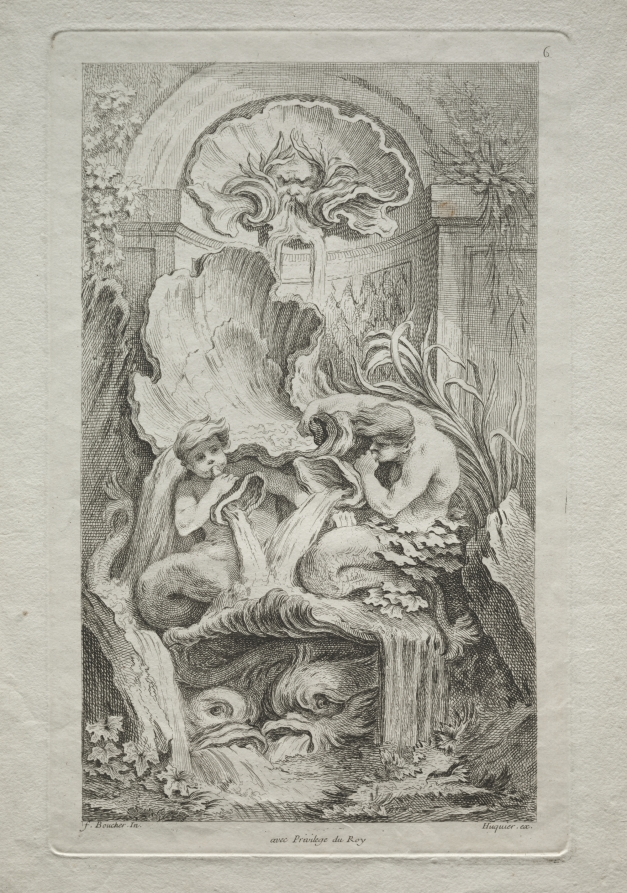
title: No. 6: Fountain with Two Tritons Blowing Conch Shells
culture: France, 18th century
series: Book of Fountains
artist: Gabriel Huquier (French, 1695–1772)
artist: after François Boucher (French, 1703–1770)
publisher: Gabriel Huquier (French, 1695–1772)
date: c. 1736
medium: etching and engraving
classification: Print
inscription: Upper right, in plate: 6; lower left, in plate: F. Boucher. In.; lower center, in plate: avec Privilege du Roy; lower right, in plate: Huquier. ex.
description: François Boucher’s design for a fountain presents an elaborate artistic fantasy with details drawn from mythology and the natural world. Two sea creatures, half-human and half-fish hybrids known as tritons, sit in a shell basin playing a pair of conchs. In the print, Gabriel Huquier transformed Boucher’s rocky grotto into a shell niche featuring the head of the sea god, also called Triton. These designs, though fanciful, reflect a wider Enlightenment interest in the collection and study of shells. In fact, French naturalist Antoine-Joseph Dezallier d’Argenville even opened his scientific treatise on shells, La Conchyliologie, with a related print by Boucher.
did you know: In addition to his fame as an artist, Boucher was known by his contemporaries for his important collection of shells.